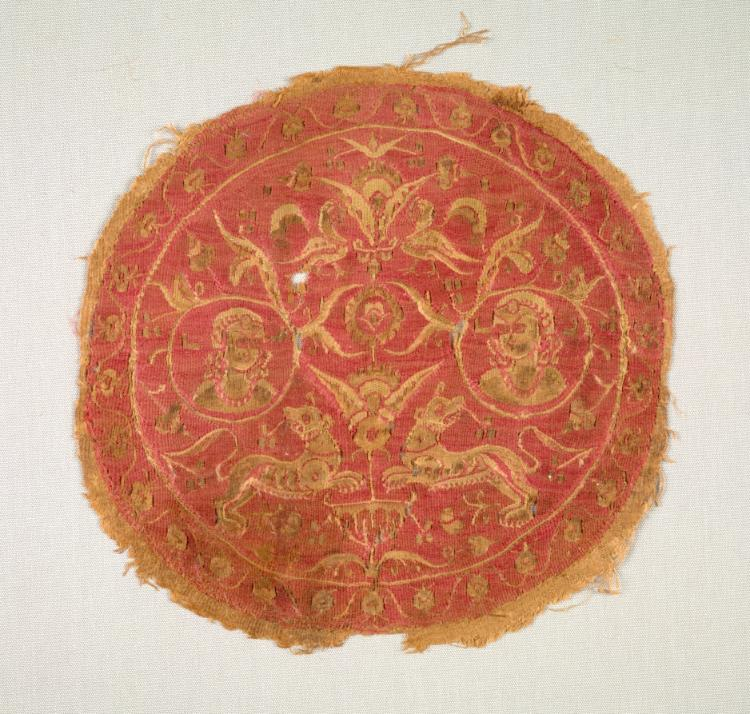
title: Busts and Animals Under Tree of Life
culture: Egypt, Islamic period, Abbasid, 8th - 9th century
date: late 700s - 800s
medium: Plain weave and slit-tapestry weave; undyed linen, dyed wool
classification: Textile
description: This elegant symmetrical roundel, probably from a tunic, features a central tree of life with leaves enclosing the bust of a woman on each side. Animals above the bowl and birds toward the top flank the tree which is framed by a sinuous vine.